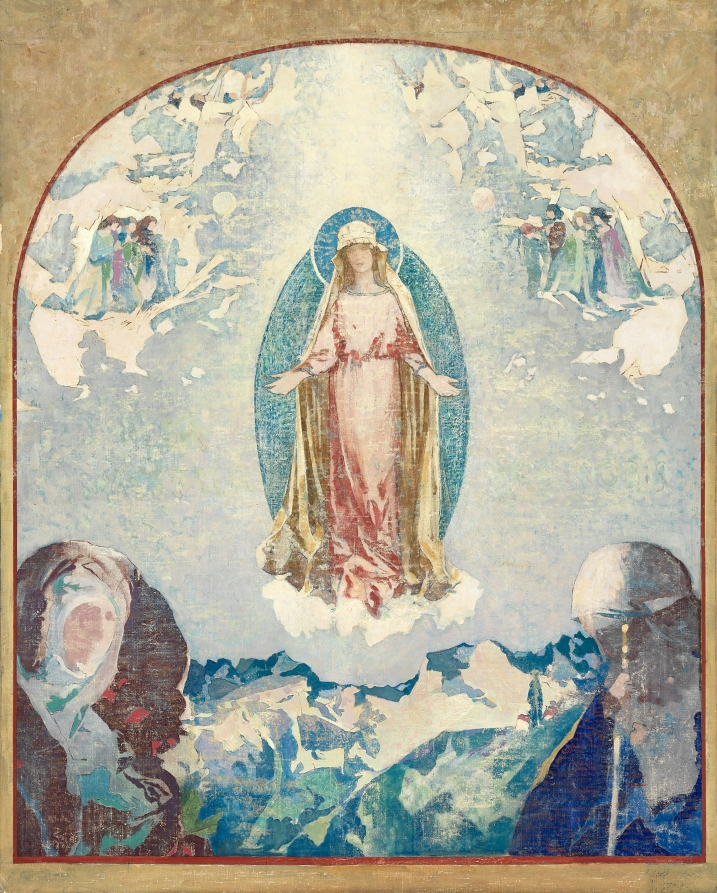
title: Rosa Mystica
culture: America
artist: Augustus Vincent Tack (American, 1870–1949)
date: c. 1923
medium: oil on canvas, on wood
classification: Painting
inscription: signed lower right: TACK